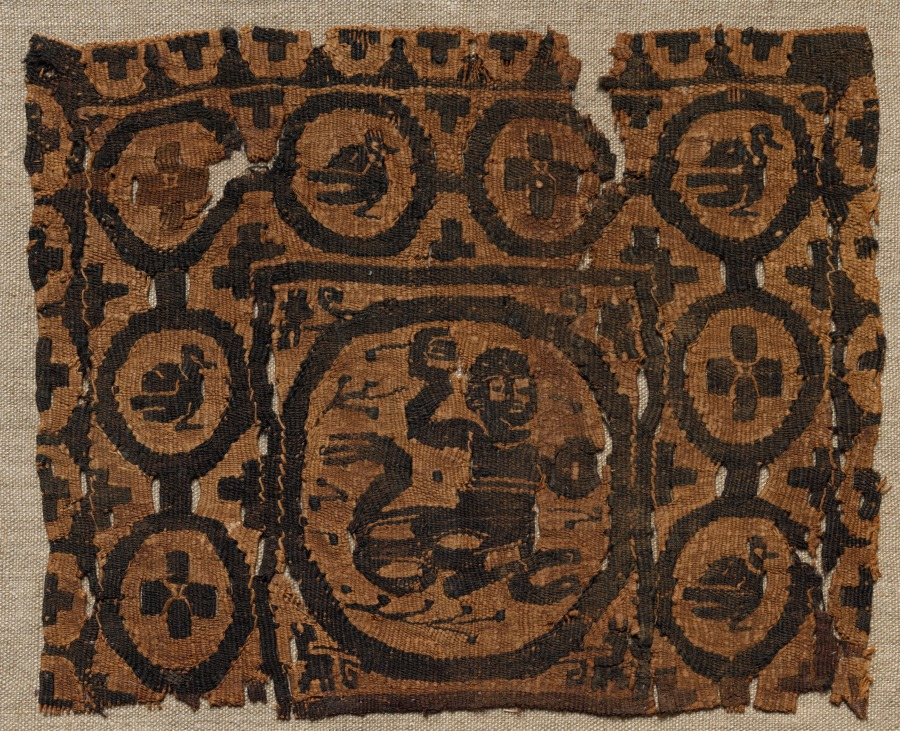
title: Fragmentary Segmentum from a Tunic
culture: Egypt, Byzantine period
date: 500s - 600s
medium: tapestry weave (originally inwoven in a tabby ground ?): wool and linen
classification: Textile